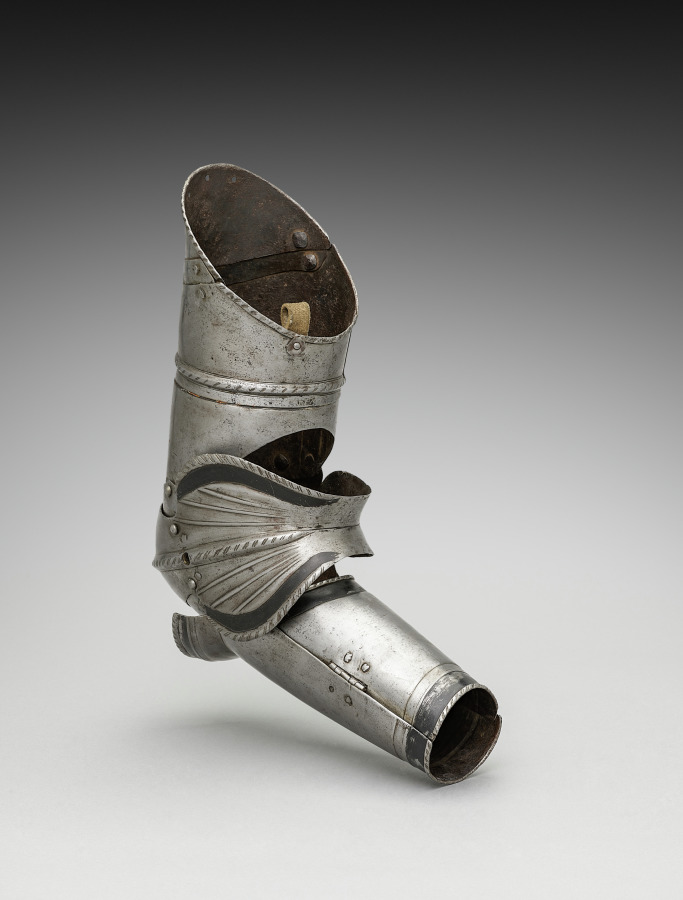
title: Right Vambrace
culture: Germany, 19th century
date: 1801–1900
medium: steel with black paint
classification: Arms and Armor